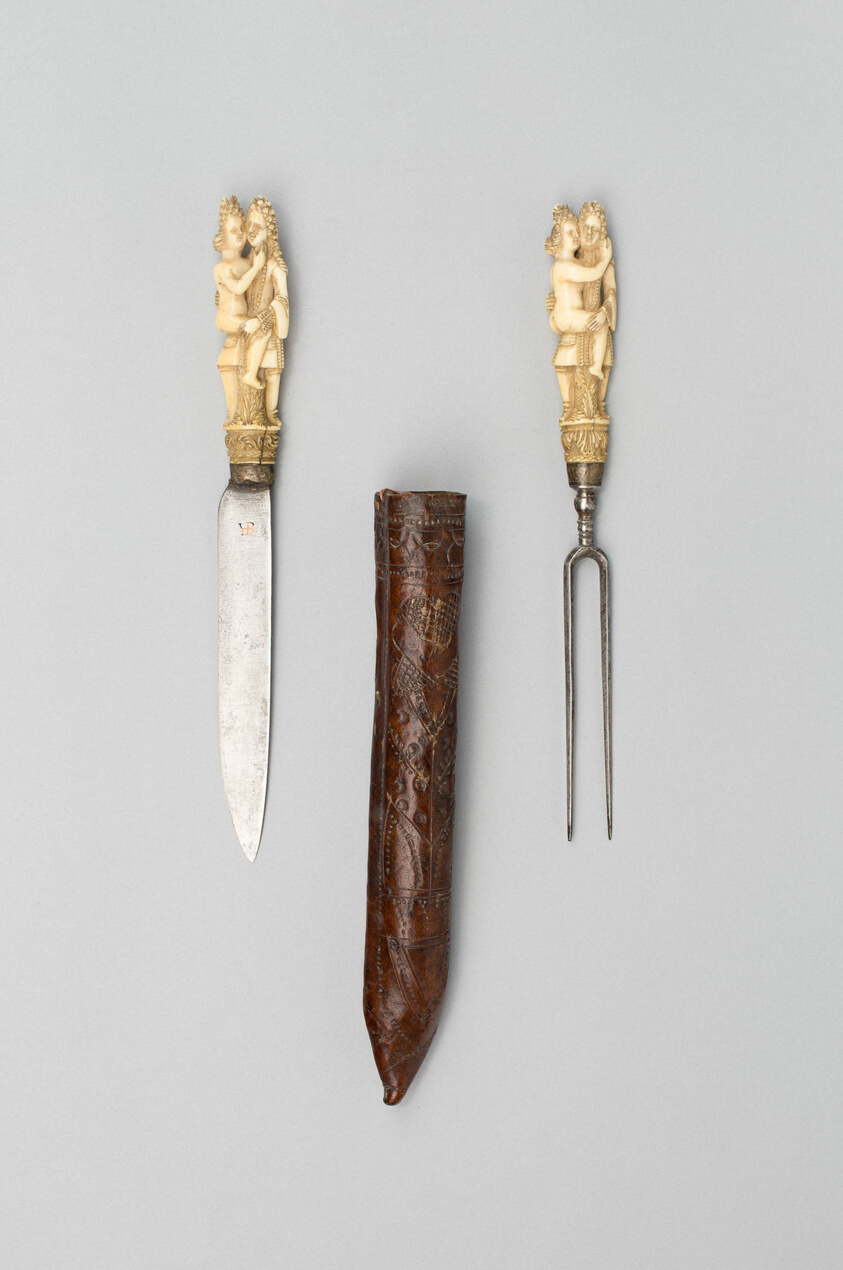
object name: Metalwork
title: Knife and Fork with Sheath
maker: European, possibly Dutch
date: late 17th century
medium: Steel, copper, ivory, and leather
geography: Europe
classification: cutlery; arms and armor, miscellaneous; arms and armor; arms